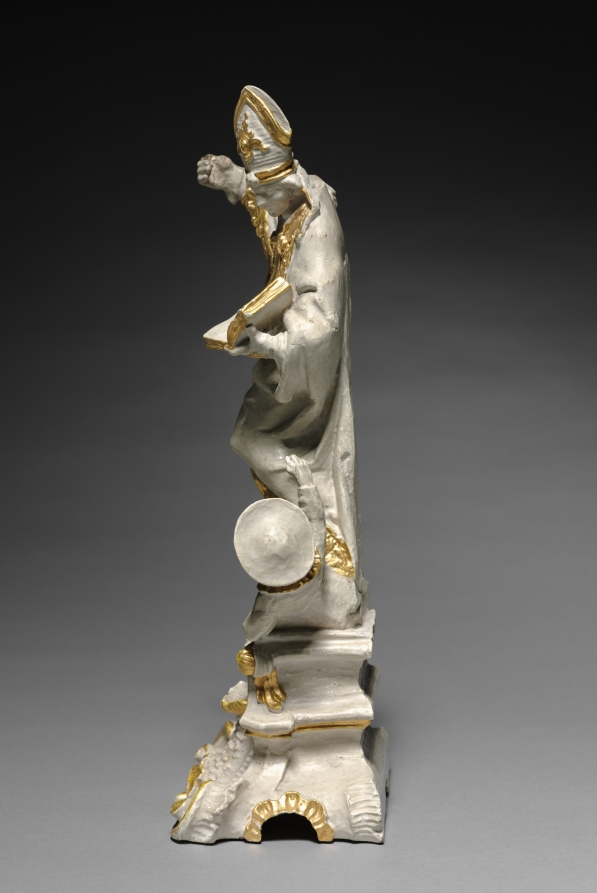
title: Bishop Saint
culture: Germany, 18th century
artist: attributed to Ferdinand Tietz (Austrian, 1708–1777)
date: c. 1740–1750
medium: painted and gilded wood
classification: Sculpture